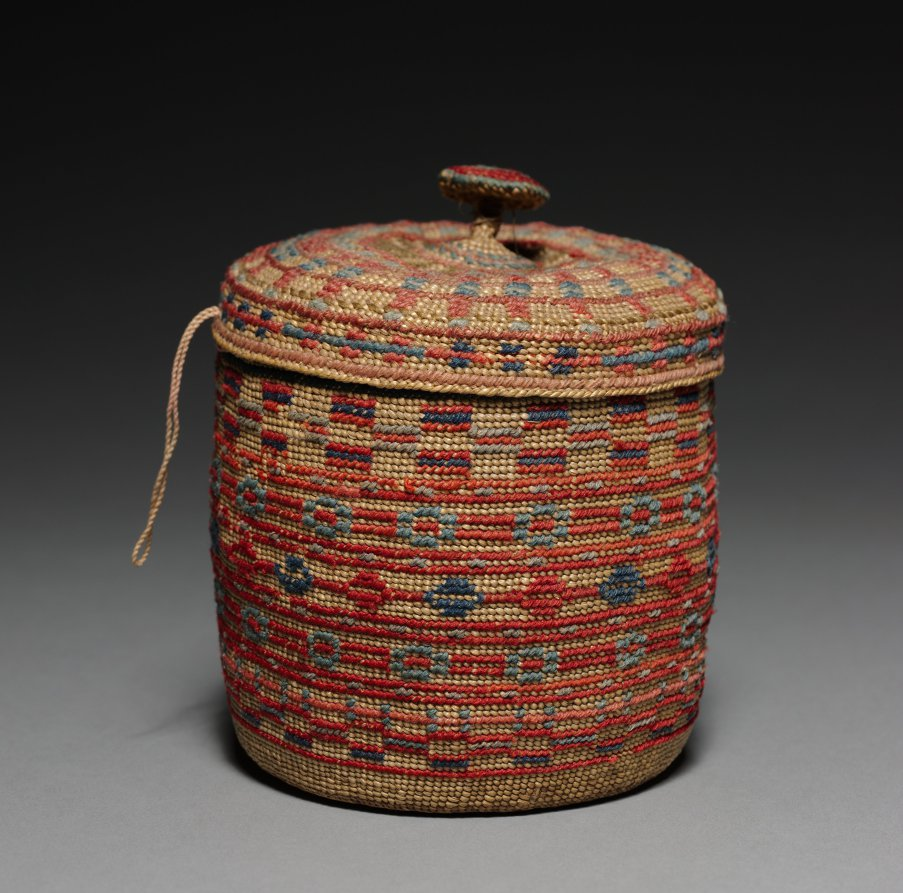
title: Covered Basket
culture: Arctic, Aleut, late 19th-early 20th century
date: late 1800s–early 1900s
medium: wool embroidery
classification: Basketry